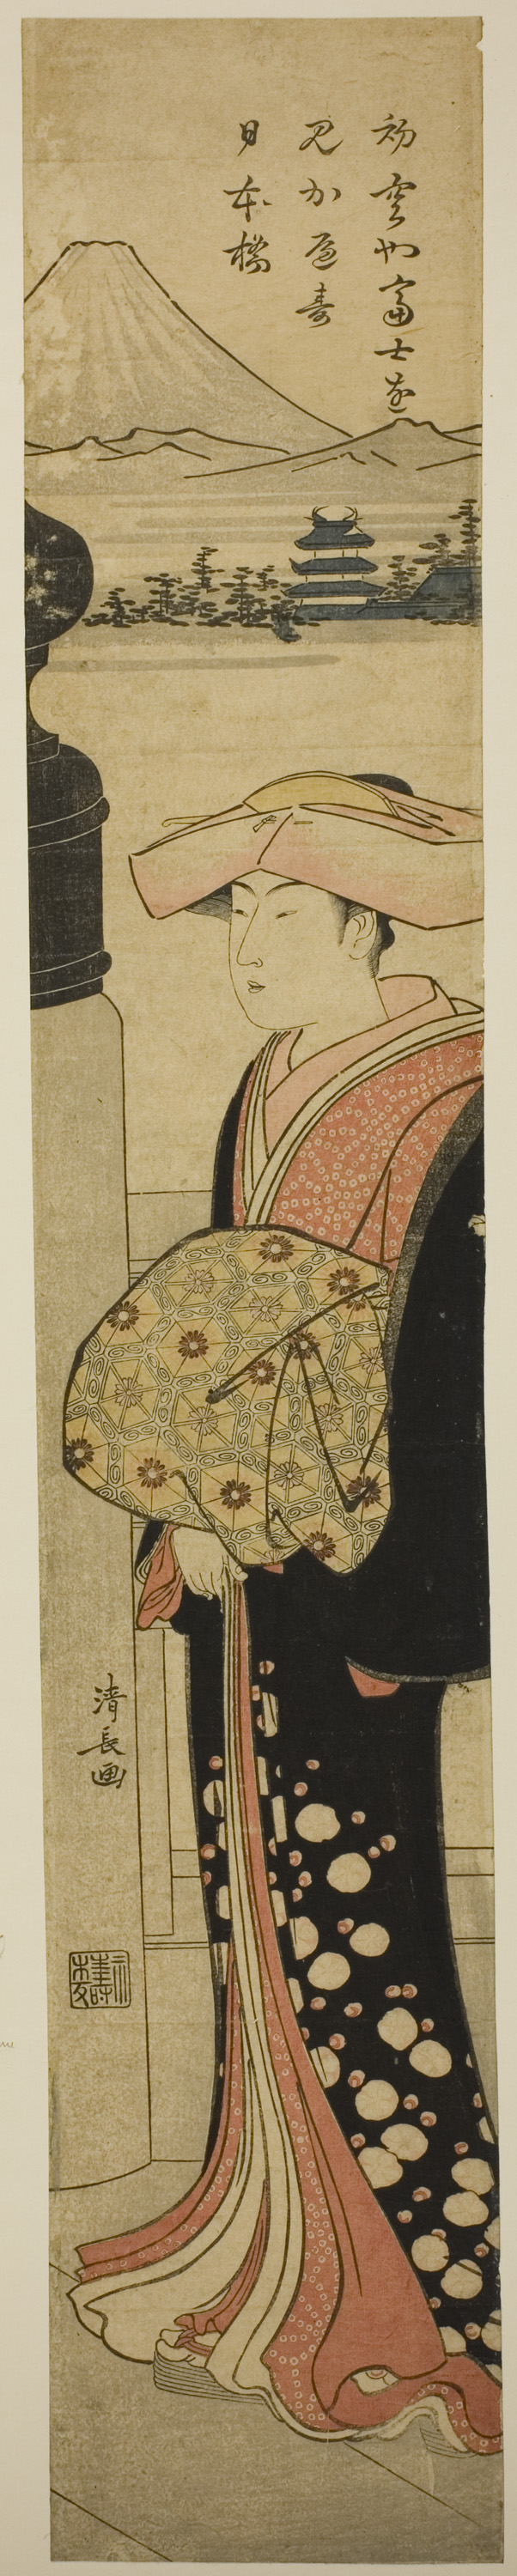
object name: Print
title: Finely-Dressed Woman Crossing Nihonbashi Bridge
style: Japanese (culture or style)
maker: Torii Kiyonaga (Japanese, 1752-1815)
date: c. 1783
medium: Color woodblock print; hashira-e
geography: Japan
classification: woodblock print; print; asian art